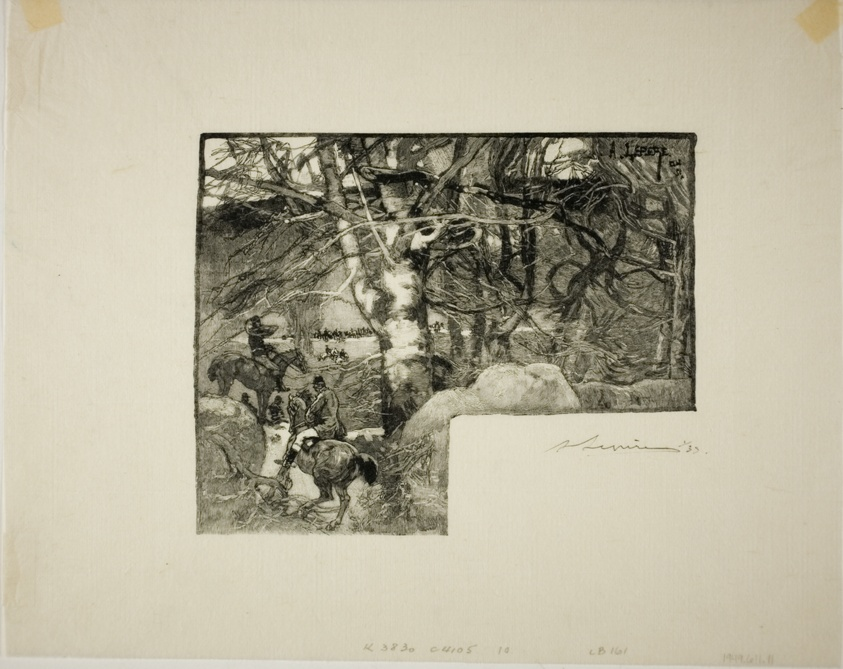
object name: Print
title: Ride to the Hounds, Mont-Gérard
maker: Louis Auguste Lepère (French, 1849-1918); published by A. Desmoulins (French, active c. 1908-1910)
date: published 1908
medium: Wood engraving in black on cream laid Japanese paper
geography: France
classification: wood engraving; print; prints and drawing